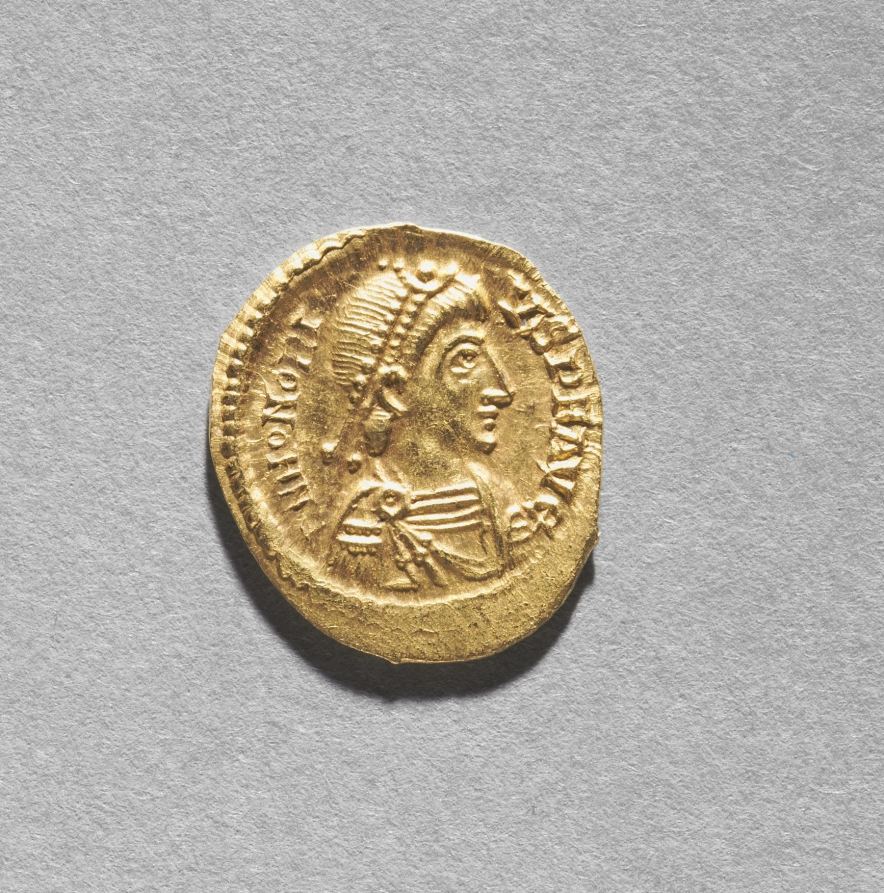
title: Solidus of Arkadios (obverse)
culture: Byzantium, Constantinople, Byzantine period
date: 395–408 CE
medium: gold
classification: Coins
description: The vast number of surviving Byzantine coins attests to the level of trade across the empire. Controlled and supervised by the emperor, the producers of coins took care to represent his authority and reflect his stature. Talented artists were recruited to engrave the dies (molds) used for the striking of coins. Emperors increasingly came to include their heirs and co-emperors on their coinage, as well as other family members or even earlier rulers. Coins were recognized, then as now, as small, portable works of art. With their inscriptions and images, Byzantine coins provide valuable documentation of historical events and a record of the physical appearance of the emperors. The coins shown here include the solidus, the basic gold coin of 24 karats; the tremissis, a gold coin of one-third the weight and value of the solidus; and the nomisma, which in the 10th century replaced the solidus as the standard gold coin.